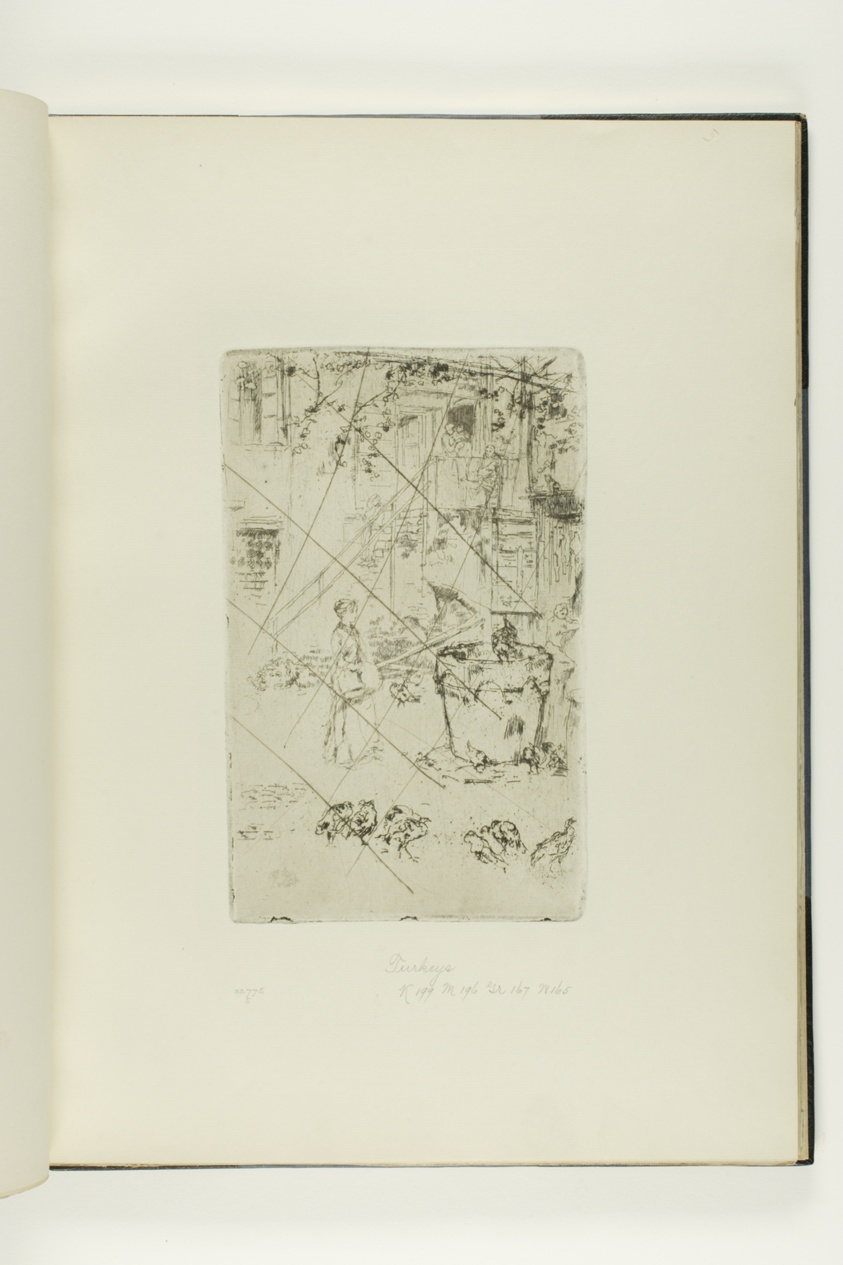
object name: Print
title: Turkeys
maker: James McNeill Whistler (American, 1834-1903)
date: 1880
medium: Etching and drypoint with foul biting, with drypoint cancellation, in black ink on ivory laid paper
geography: United States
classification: etching; prints and drawing; print; drypoint; foul biting; book; paper